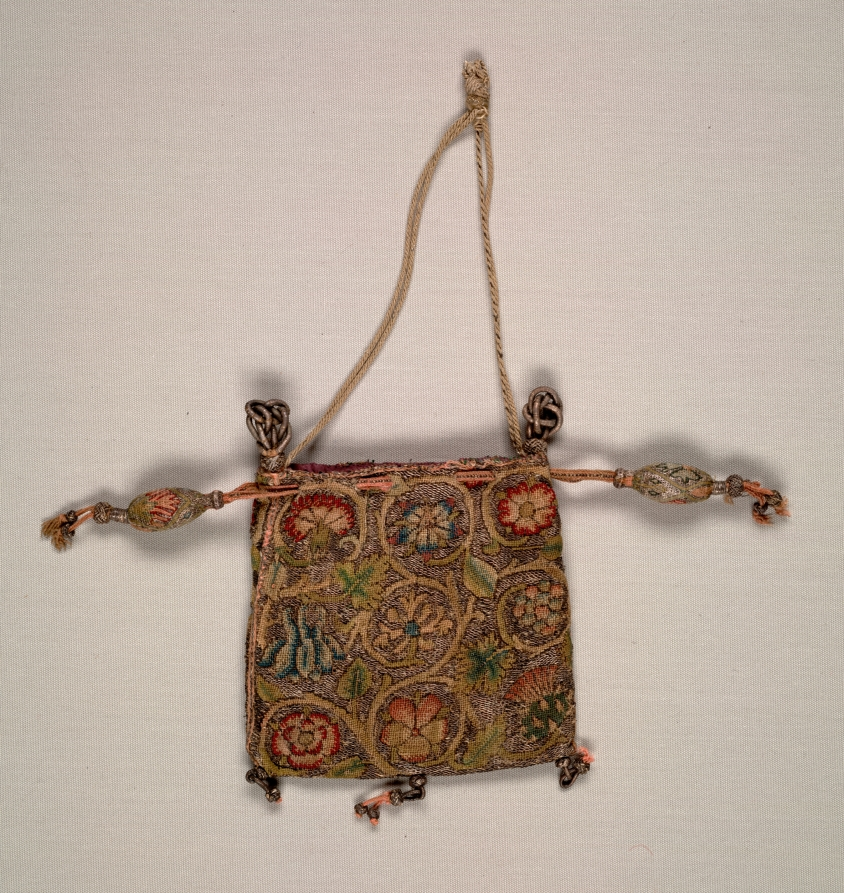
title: Purse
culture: England, early 17th century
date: early 1600s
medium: embroidery; silk and silver filé on linen ground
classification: Embroidery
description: According to Elizabethan embroidery scholar Jacqui Carey, the scale and construction of this purse and its trimmings are typical of a so-called ‘sweet bag’, a container for sweet-smelling substances. This term was popularized in George Wingfield Digby’s 1963 publication on Elizabethan embroidery; Digby used the term to describe small English purses dating from the 1500s and 1600s. In CMA’s example, the handle and lining look to be later replacements. The embroidery is worked on an open plain weave linen fabric with silk in a range of colors and silver metal thread (thin metallic strips wrapped around a white silk core). In places, the inked design is visible on the linen. The stitches used for the purse’s background are unusual in that they lie horizontally rather than vertically. The rectangle of embroidered fabric was folded along the base and stitched together up the sides. Ten holes are pierced through the embroidered fabric near the top edge of the purse. Two drawstrings, terminating in ornate tassels, are threaded through the holes. The nine floral motifs-- carnation, borage, rose, columbine, honeysuckle, grapes, rose, pansy and thistle—set within coiling stems and foliage are typical of the period. Two embroidery stitches were used, tent stitch and Elizabethan ground stitch.